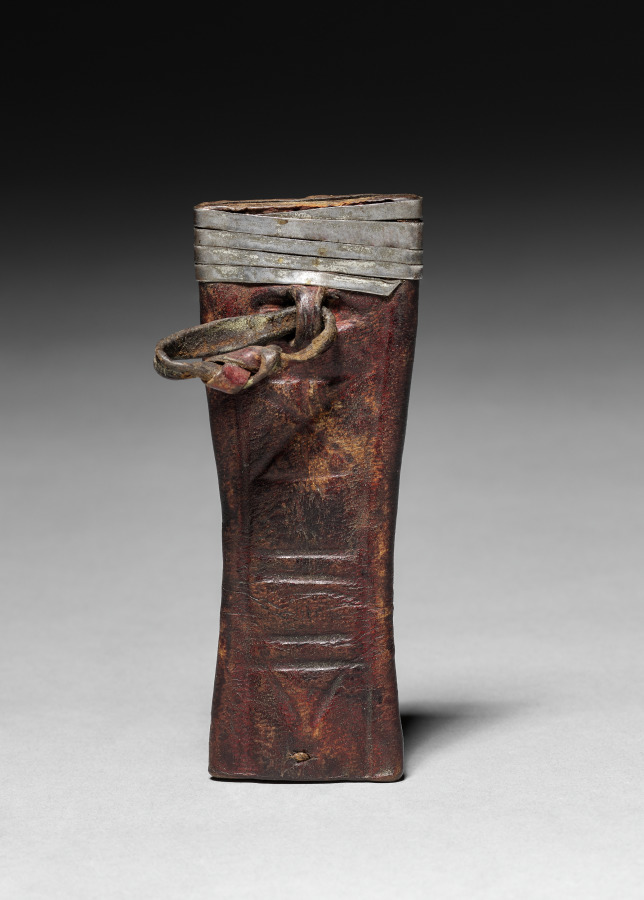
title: Sheath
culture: Central Africa, Democratic Republic of the Congo, Mangbetu, 20th century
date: 1900s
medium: Leather and tin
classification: Arms and Armor